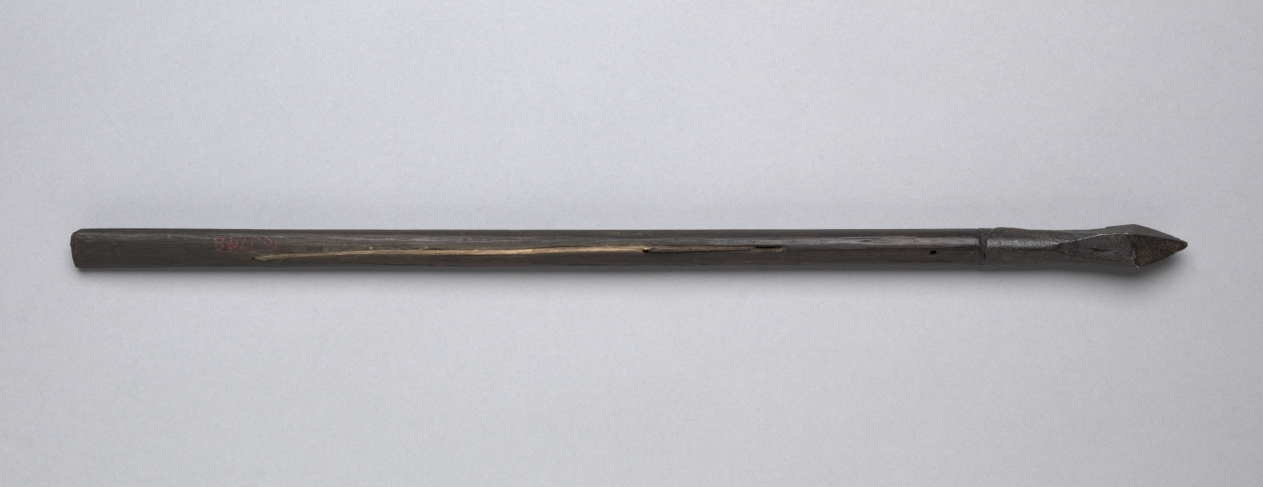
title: Crossbow Bolt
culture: Germany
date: 1500s-1600s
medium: wood, leather, steel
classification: Arms and Armor